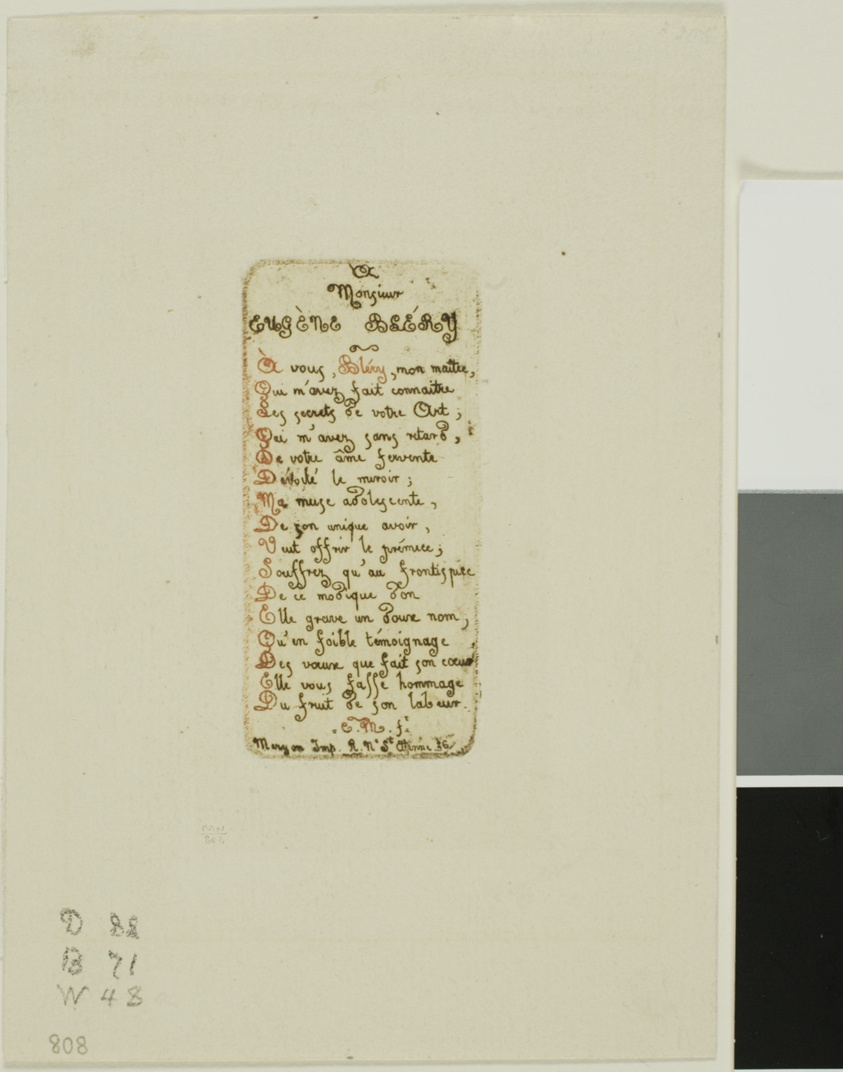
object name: Print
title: Verses Dedicated to Eugène Bléry, No. 1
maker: Charles Meryon (French, 1821-1868)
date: 1854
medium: Etching in brown ink with some printing à la poupée in red ink on ivory wove paper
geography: France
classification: etching; print; prints and drawing